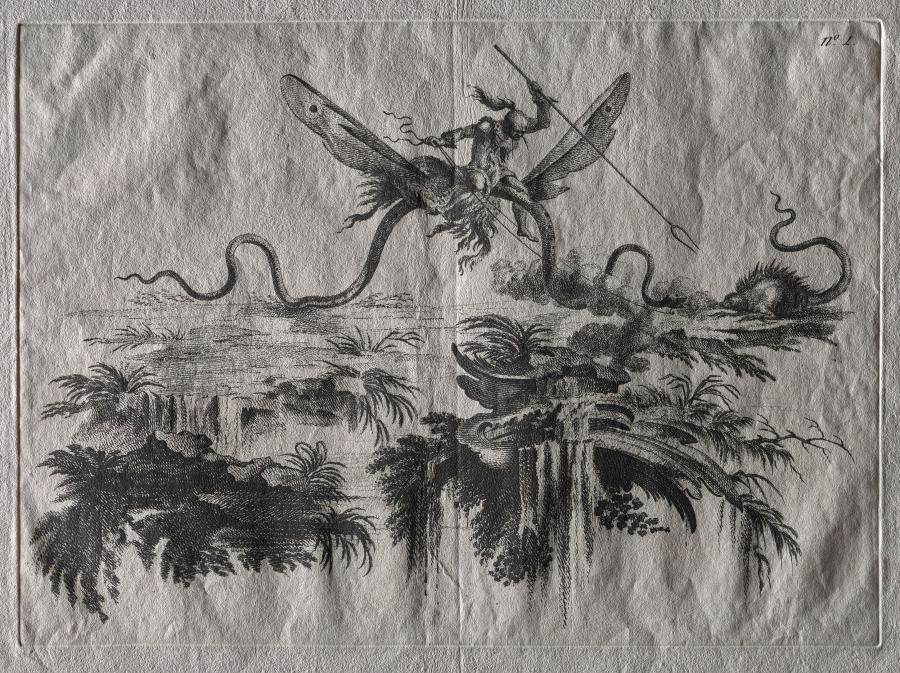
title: A Savage mounted on a winged Serpent battling with a wild beast resembling a Porcupine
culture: Italy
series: Suite of the Most Notable Things Seen by John Wilkins Erudite English Bishop during His Famous Voyage from the Earth to the Moon … dedicated to Sir William Hamilton ambassador to the Court of Naples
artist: Filippo Morghen (Italian, 1730–after 1807)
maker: possibly after Jean-Pierre-Louis-Laurent Hoüel (French, 1735–1813)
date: about 1769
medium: etching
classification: Print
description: Filippo Morghen’s set of 10 etchings is outstanding among visual narratives of imaginary voyages to the moon, both visual and literary, that intrigued 18th-century European audiences. A title page and nine plates depict the imagined lives and economy of moon dwellers. These include modes of transport such as large birds and sailboats propelled by giant bellows, enormous scissors for capturing wild beasts (including an oversized rat), and the use of giant pumpkins as fishing boats and as dwellings. Representations of the moon dwellers are based on inaccurate and imaginary European interpretations of Asian, Ottoman, and Native American cultures—called chinoiserie and turquerie—that permeated the decorative and visual arts of the period.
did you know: Morghen based this print series on three books dedicated to moon exploration, including Bishop Francis Godwin’s The Man in the Moone (1640).